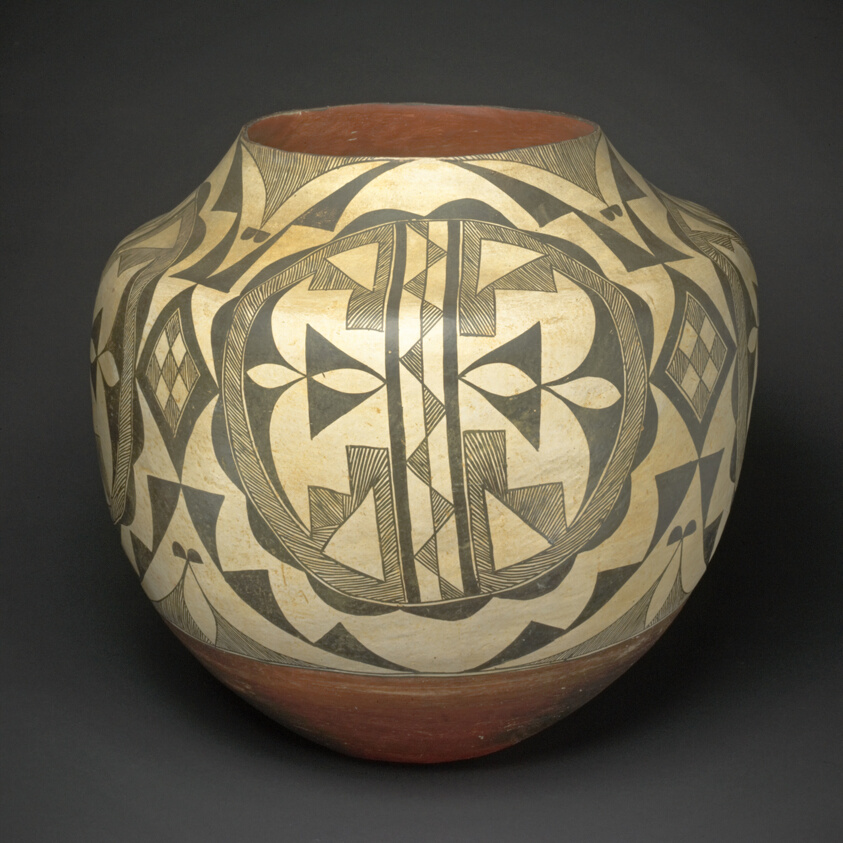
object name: Vessel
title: Black-and-White Storage Jar with Abstract Geometric Motifs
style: acoma, southwest, pueblo, americas, native american, native north american, Arts of the Americas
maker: Acoma; Acoma Pueblo, New Mexico, United States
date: 1890s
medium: Ceramic (earthenware) and pigment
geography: New Mexico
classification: vessel; ceramics; art of the americas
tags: geometric, water, storage, servingware, patterns, floral, plant-derived motif